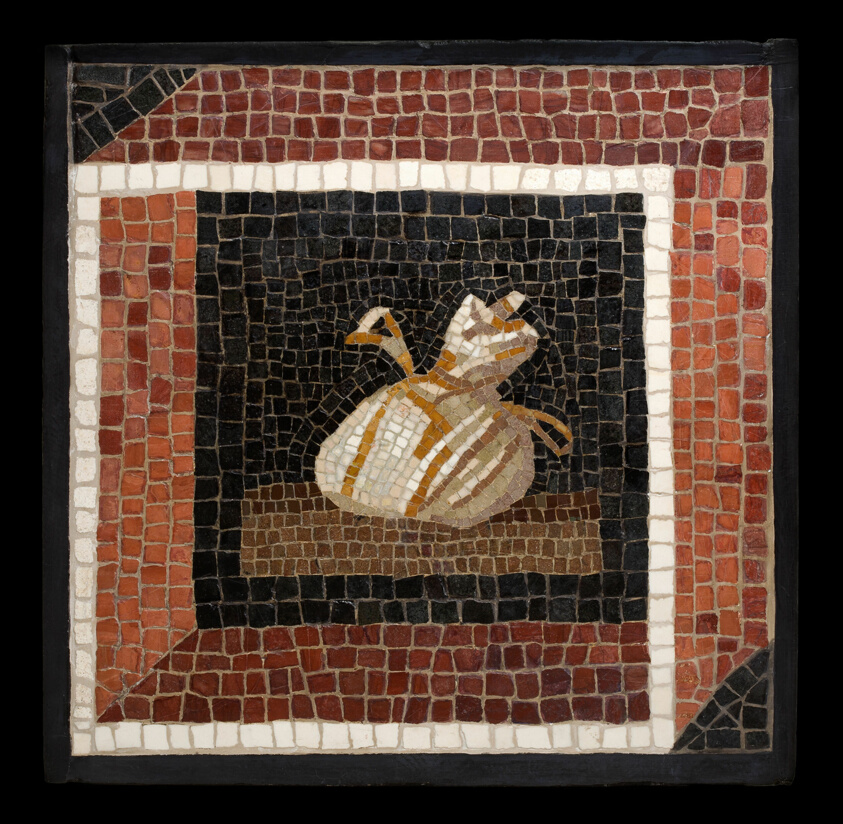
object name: Architectural fragment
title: Mosaic Floor Panel Depicting a Sack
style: roman (ancient, style or period)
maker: Roman; Rome, Italy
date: 2nd century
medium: Stone, mortar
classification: architectural fragment